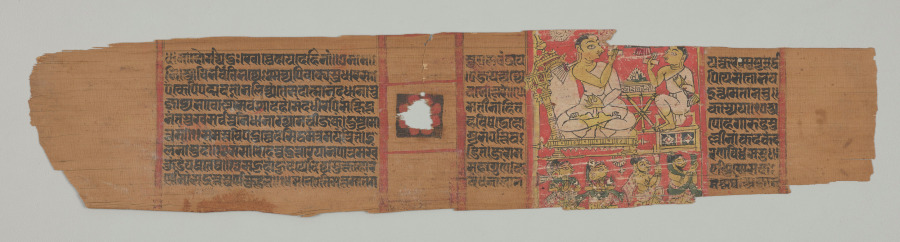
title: Monk preaching to a disciple with a lay audience, folio 2 (recto) from a Parshvanatha Charitra (Life and Stories of Lord Parshva) of Bhavadeva-suri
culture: Western India, Gujarat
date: c. 1275–1300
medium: Gum tempera and ink on palm leaf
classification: Painting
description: The scene of a senior monk teaching his disciple emphasizes the importance of oral transmission of stories and knowledge. Both wear the white robes of the Shvetambara sect, have whisk brooms for clearing the ground of living things, and hold shields in front of their mouths to prevent harm to insects that might fly in while they speak. Between them, on a tripod, rests a sacred manuscript with letters written on the side and flowers placed on top. Below, two women and two men, possibly the donors who paid for the production of the manuscript, press their hands together in veneration.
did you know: The book on the stand is called "substitute teacher" and refers to the monk's legitimate lineage of knowledge.